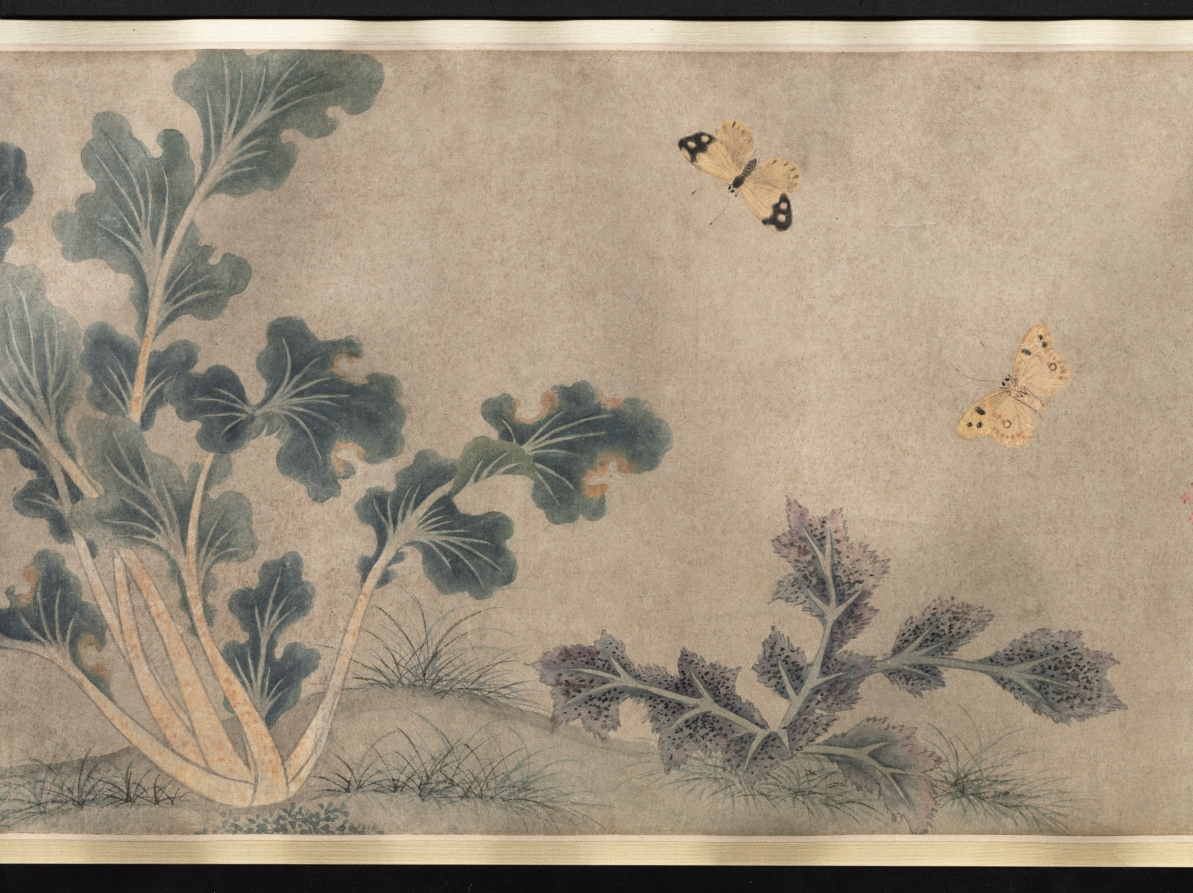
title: Insects and Flowers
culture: China, Qing dynasty (1644-1911) or Republican period (1912-49)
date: c. 1900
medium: Handscroll, ink and color on paper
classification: Painting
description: More than 26 feet long, this scroll presents insects, reptiles, and plants in delicate brushwork and pale colors, referring in style to earlier Southern Song dynasty (1127–1279) bird-and-flower paintings. Upon closer inspection, ants dismember a butterfly and reptiles wait to ambush their prey. An inscription at the end of the painting gives us an idea of its meaning: Attributed to the Qing dynasty scholar Zhang Xigeng (張錫庚, 1801–1861), the inscriber relates the work to an earlier painting by Qian Xuan (錢選, c. 1235–before 1307) and further suggests that the painting may allude to the relentlessness of natural selection. By drawing a parallel to tumultuous episodes in Chinese history, the writer might even hint at the domestic rebellions and the aggression of Western powers against China in his lifetime, particularly the Opium Wars (1839–60).